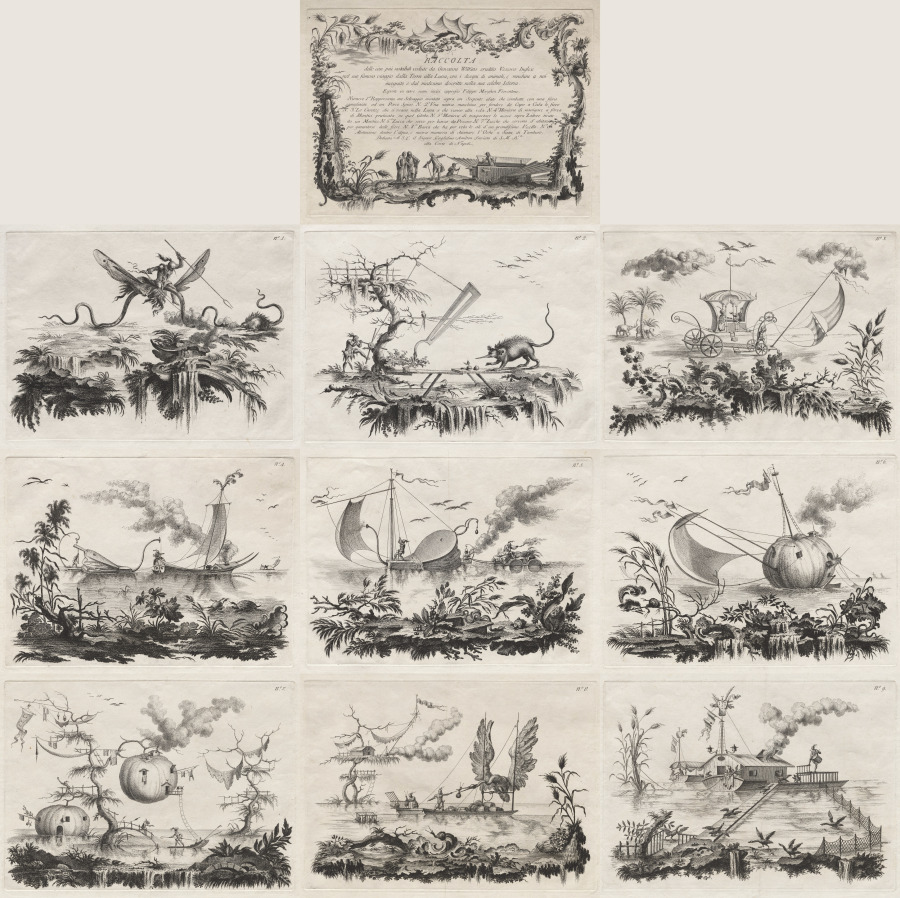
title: Suite of the most notable things seen by John Wilkins erudite English Bishop during his famous voyage from the Earth to the Moon … dedicated to Sir William Hamilton ambassador to the Court of Naples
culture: Italy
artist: Filippo Morghen (Italian, 1730–after 1807)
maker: possibly after Jean-Pierre-Louis-Laurent Hoüel (French, 1735–1813)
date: about 1769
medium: Suite of 10 etchings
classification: Portfolio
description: Filippo Morghen’s set of 10 etchings is outstanding among visual narratives of imaginary voyages to the moon, both visual and literary, that intrigued 18th-century European audiences. A title page and nine plates depict the imagined lives and economy of moon dwellers. These include modes of transport such as large birds and sailboats propelled by giant bellows, enormous scissors for capturing wild beasts (including an oversized rat), and the use of giant pumpkins as fishing boats and as dwellings. Representations of the moon dwellers are based on inaccurate and imaginary European interpretations of Asian, Ottoman, and Native American cultures—called chinoiserie and turquerie—that permeated the decorative and visual arts of the period.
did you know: Morghen based this print series on three books dedicated to moon exploration, including Bishop Francis Godwin’s The Man in the Moone (1640).